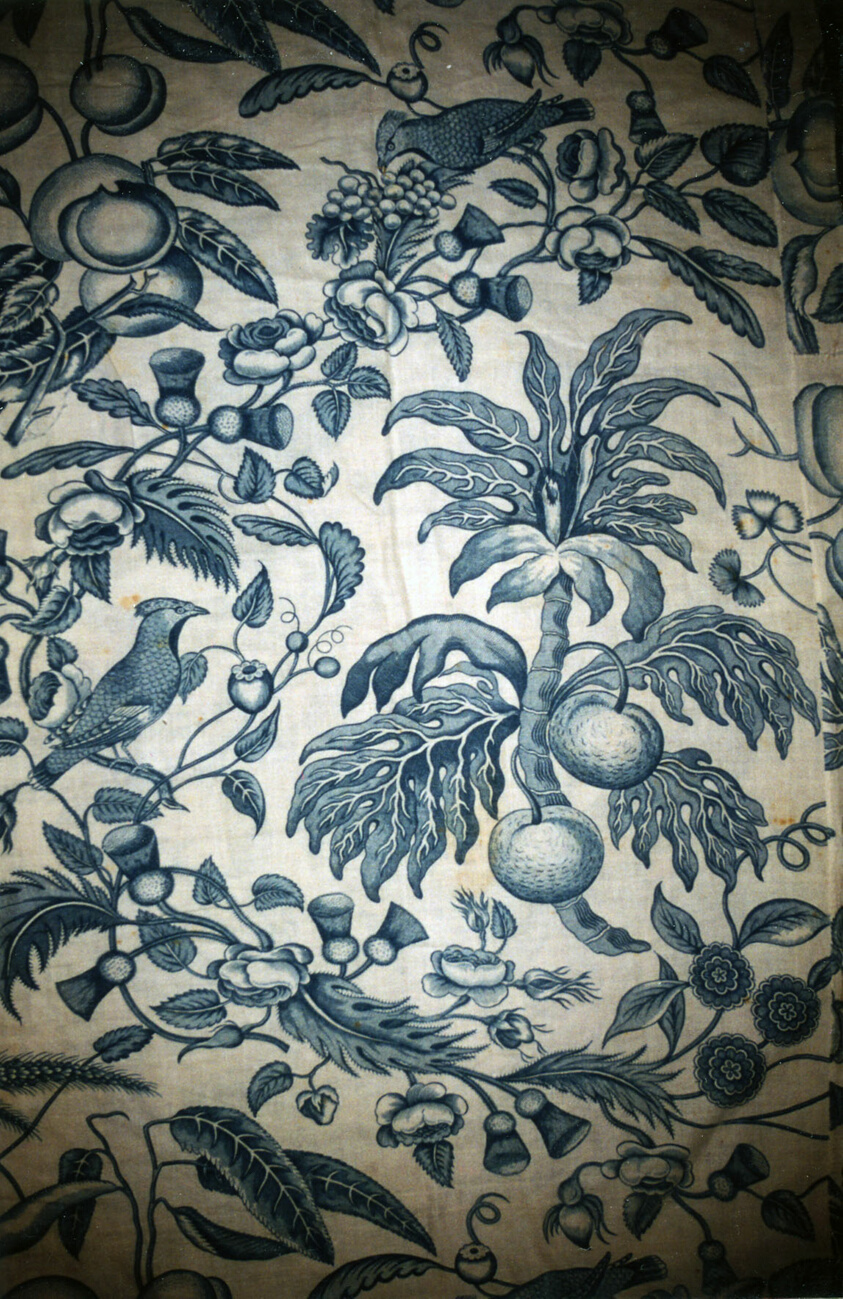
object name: Textile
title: Panel (Furnishing Fabric)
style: chinoiserie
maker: Designed by Ollive and Talwin (English, 1763–1783); Manufactured at Bromley Hall (English, 1694–1823); England, Middlesex, Poplar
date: c. 1780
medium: Cotton, plain weave; copperplate printed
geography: Middlesex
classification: textile; weaving - printed; weaving; furnishing textile